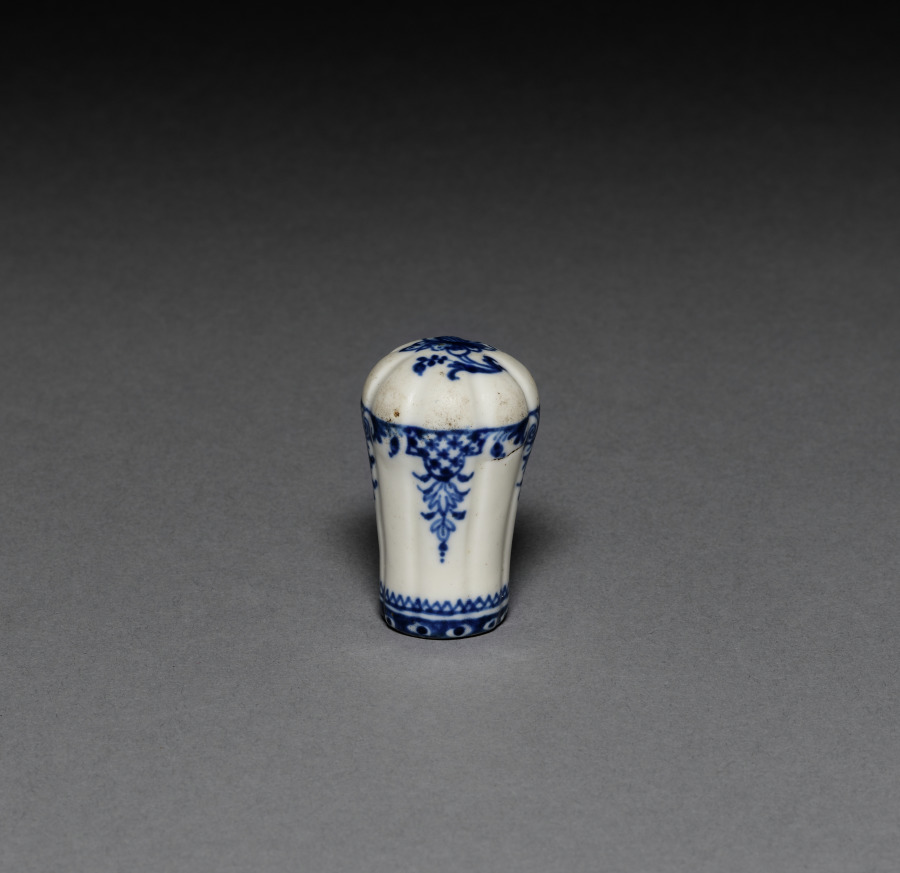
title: Cane Handle (Poignée de canne)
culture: France, Saint Cloud, early 18th Century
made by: Saint Cloud Porcelain Factory (French)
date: c.1700–1720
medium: soft-paste porcelain with underglaze blue decoration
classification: Ceramic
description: With its ribbing and underglaze blue decoration in the form of draping blue garlands, this porcelain handle was likely among the first to have been produced at the Saint-Cloud Porcelain Factory. Though Saint-Cloud may have been the first to produce porcelain cane handles as fashionable accessories, their popularity meant that they were soon produced at a variety of other French factories during the first half of the 1700s.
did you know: Canes, or sticks, were popular fashion accessories for aristocratic men, women, and children in 18th-century France.